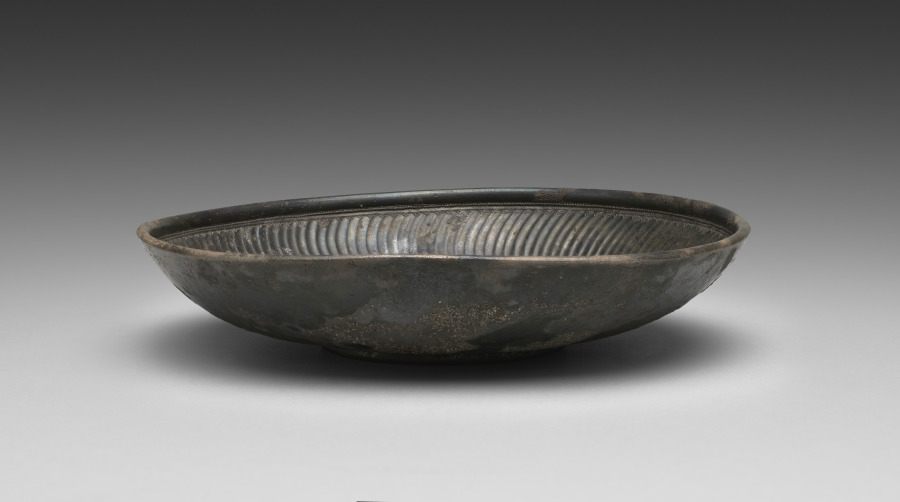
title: Bowl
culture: Roman, Imperial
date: c. 100–300 CE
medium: silver: cast and carved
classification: Metalwork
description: This large cast silver bowl features wavy fluting (sometimes called strigilation) across much of the interior, terminating in a sort of scalloped edge and finely beaded border beneath the rim. Within the central medallion are a miniature oblong shell-like object and the punched inscription VERISS (perhaps a name), both slightly off-center. The combination of wavy fluting, scalloped edges, and a shell-like object may allude to the sea, or to the liquid contents this bowl may once have contained.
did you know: This solid silver bowl weighs nearly one kilogram, more than two pounds.